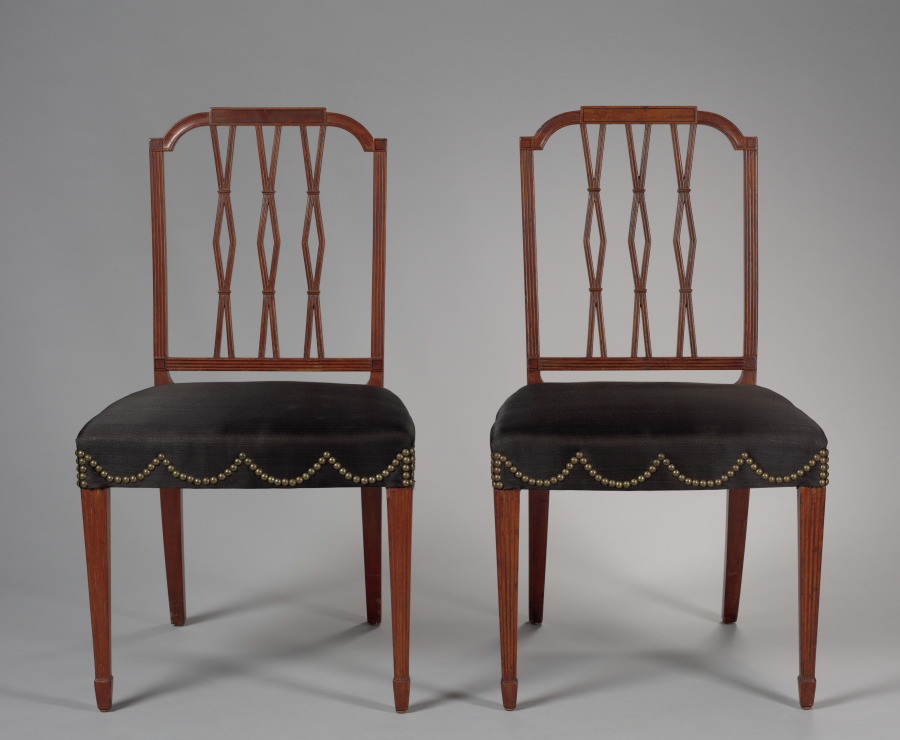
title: Side Chairs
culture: America, Massachusetts, Boston, late 18th Century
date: c. 1790–1800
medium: mahogany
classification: Furniture and woodwork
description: Chairs of this or similar design seem to have been made by several Boston cabinetmakers. This chair may have belonged to one or more members of the distinguished Derby family or West family-or both-of nearby Salem, Massachusetts.